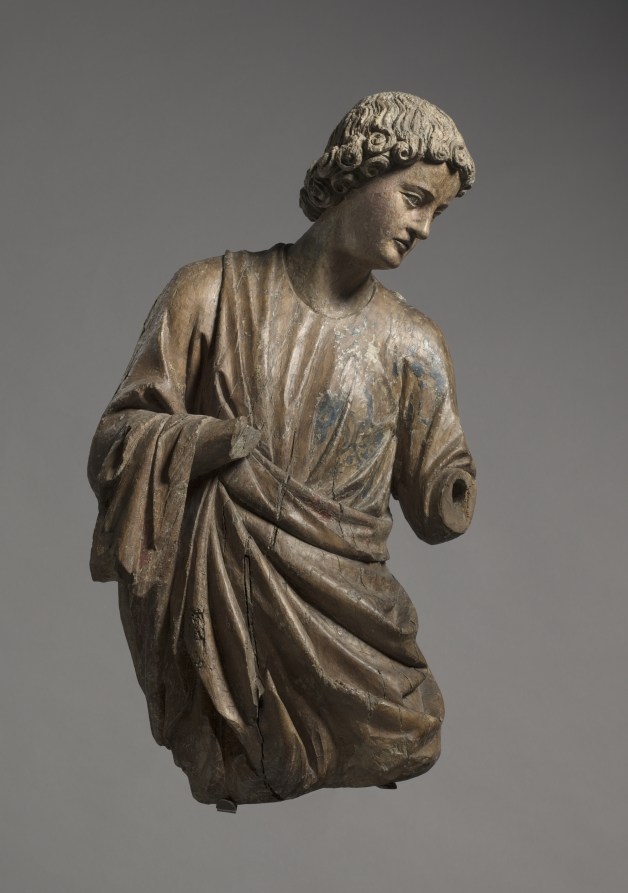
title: Angel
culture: France, vicinity of Reims, 13th century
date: c. 1250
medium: walnut with traces of gilding and polychromy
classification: Sculpture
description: Surviving in fragmentary condition, this pair of angels lacks lower arms, hands, wings, and attributes. Their original paint and gilding, now almost entirely lost, once rendered their garments a rich brocade and their hair a luxuriant gold. Nonetheless, in their graceful poses and sublime faces—which may portray tragic interest, anguish, or deep concern—their original delicacy and power are still evident. They embody the monumental style of 13th-century High Gothic cathedral sculpture in France. Their style specifically suggests they were carved in or around Reims, possibly by sculptors associated with the cathedral there. Their original placement is unknown, but they may have flanked an altar on columns.